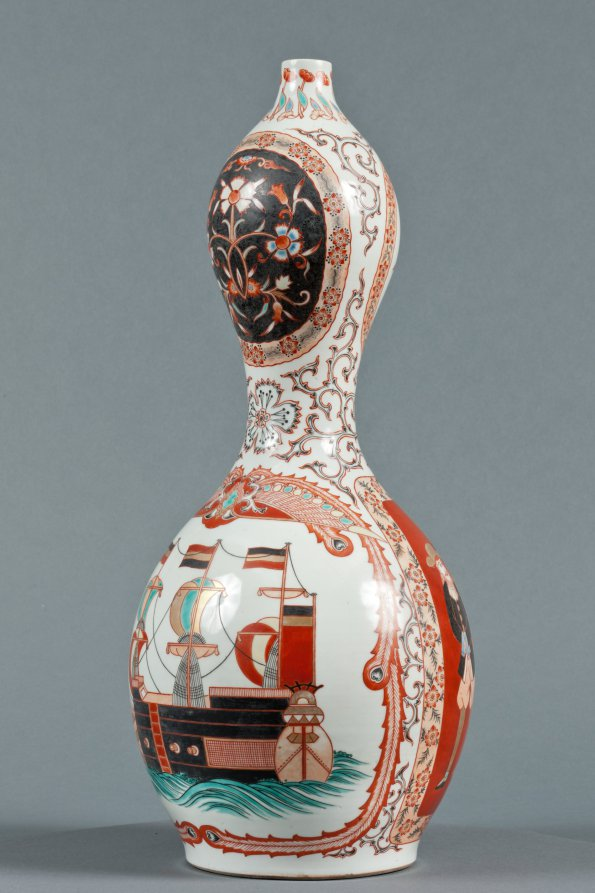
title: Bottle with Western Ships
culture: Japan, Edo period (1615–1868)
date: c. 1800–1868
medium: Porcelain with decoration in colored enamels and underglaze blue, overglaze enamels, and gold (Hizen ware, Arita type)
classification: Ceramic